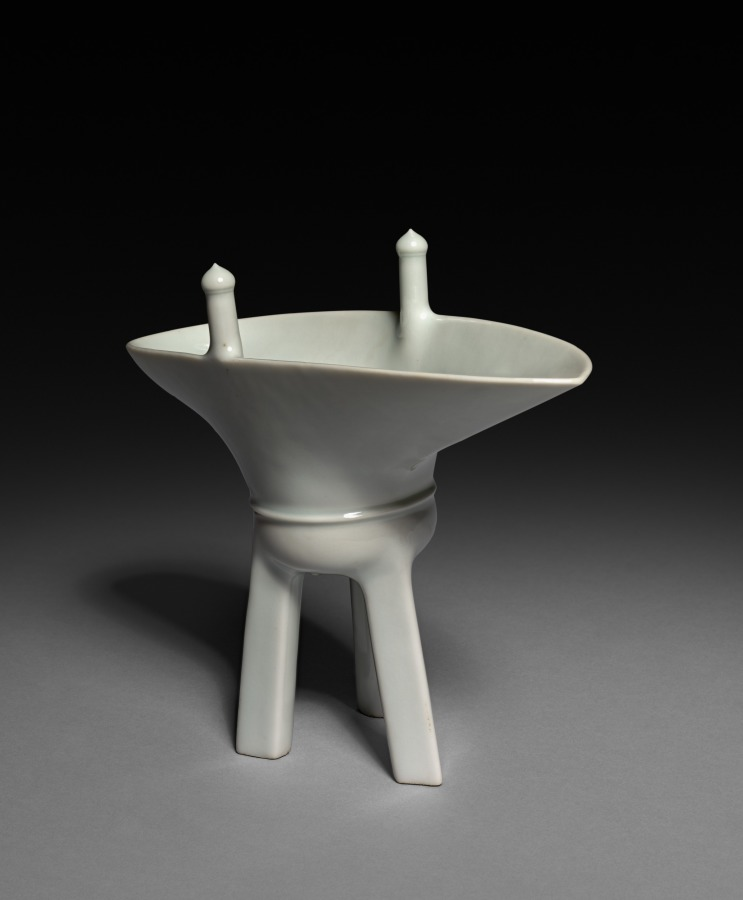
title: Libation Cup (Jue)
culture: China, Ming dynasty (1368-1644), Yongle reign (1402-1424)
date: 1402–1424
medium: glazed porcelain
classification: Ceramic